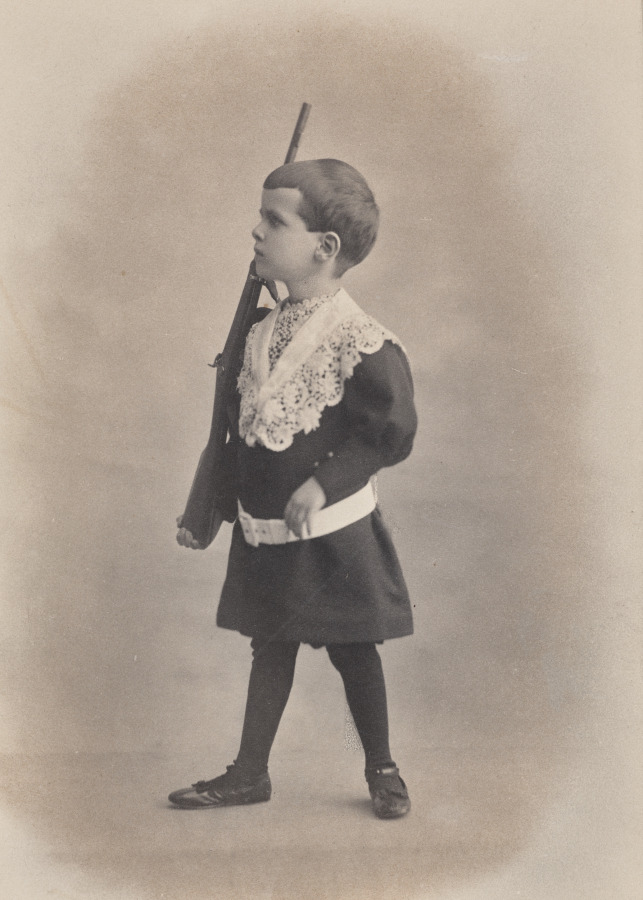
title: Untitled (young boy with lace collar and toy rifle)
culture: France, 19th century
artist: Reutlinger Studios (French, active 1850s-1937)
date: 1880s–90s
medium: gelatin silver print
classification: Photograph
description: This portrait of a boy holding a rifle suggests an association of masculinity with militarism in that era. Militaristic attitudes had a strong hold in France following the country’s defeat in the 1870–71 Franco-Prussian War. Many French people wanted revenge for Prussia’s annexation of Alsace-Lorraine, territories that did not return to French control at the end of World War I in1919. Looking at this portrait in hindsight, one might wonder if this boy served in the military or was a casualty during that war.